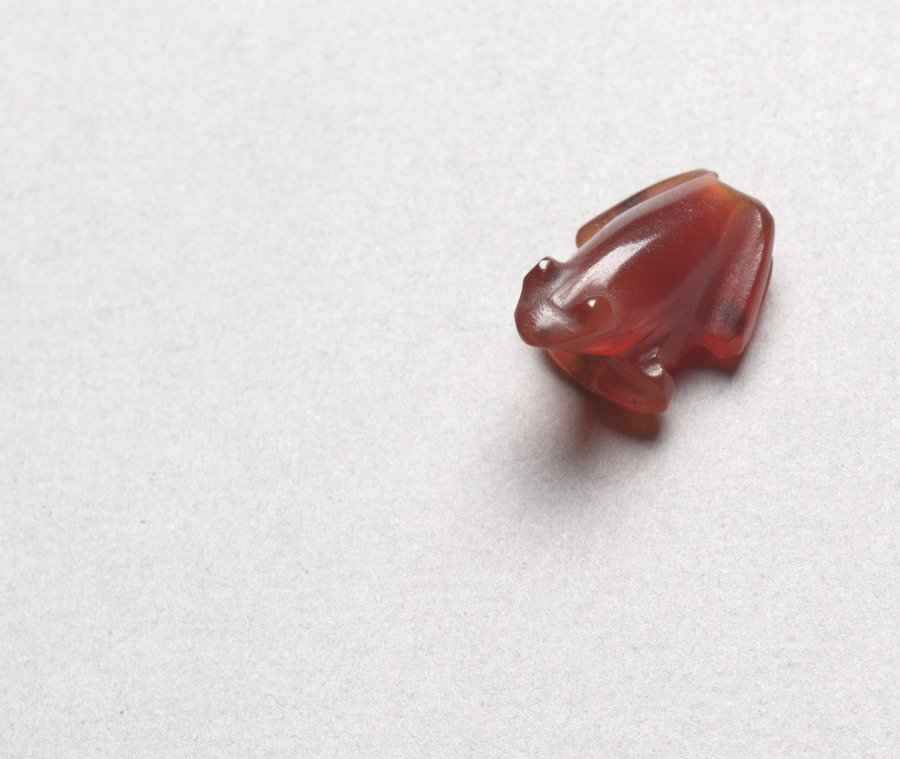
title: Frog Amulet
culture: Egypt, New Kingdom (1540–1069 BCE), Dynasty 18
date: c. 1540–1296 BCE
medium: carnelian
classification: Amulets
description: The frog, because of its numerous offspring, was a symbol of fertility. In fact, the hieroglyphic sign for 100,000 was a tadpole. Frog amulets were very popular both in semiprecious stone and in faience, and were worn by women hoping for an easy delivery. Both sexes wore the frog in expectation of a successful rebirth in the afterlife.